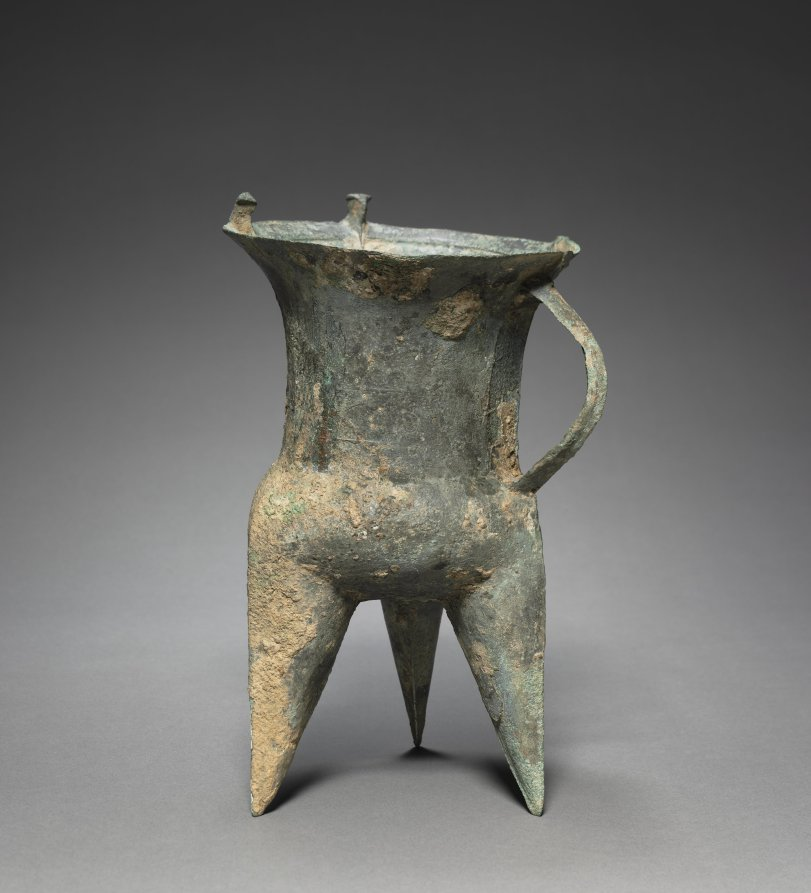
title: Wine Vessel (Jia)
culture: China, probably Henan province, Erlitou culture (c. 1900–1500 BCE)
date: c. 1700–1500 BCE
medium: bronze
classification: Metalwork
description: This wine-warming vessel, known as jia, is the earliest example of a Chinese bronze vessel in the museum collection. It reveals an already sophisticated bronze casting technology that would serve as the foundation for the later vigorous artistic developments of the Shang civilization. The use of bronze was a major turning point of the Chinese civilization. Bronze metallurgy flourished alongside other major developments in ancient China including cities, specialized craftsmanship, stratified social classes, and the invention of writing.